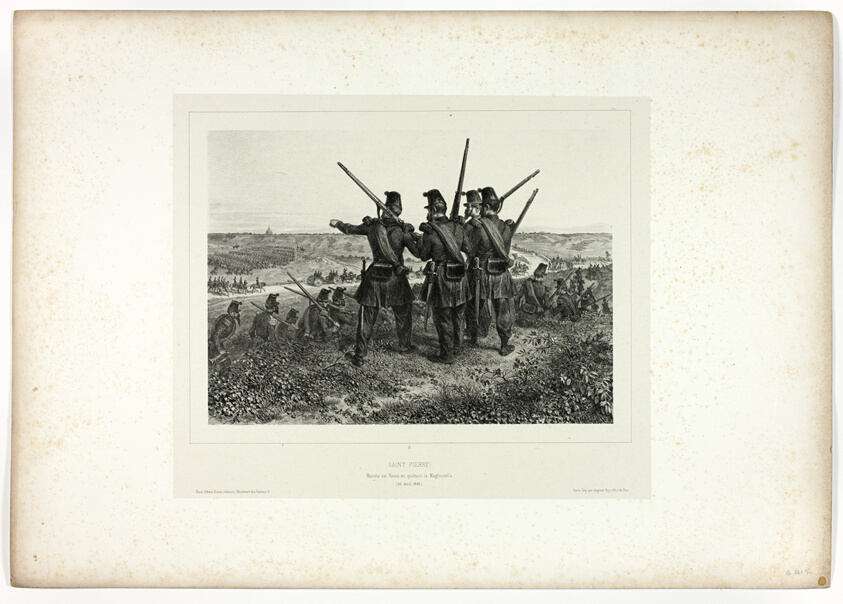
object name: Print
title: Saint Peter!, from Souvenirs d’Italie: Expédition de Rome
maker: Denis Auguste Marie Raffet (French, 1804-1860); printed by Auguste Bry (French, 19th century); published by Chez Gihaut Frères (French, 19th century)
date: 1851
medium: Lithograph in black on buff wove laid down on ivory wove paper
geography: France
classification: lithograph; print; prints and drawing